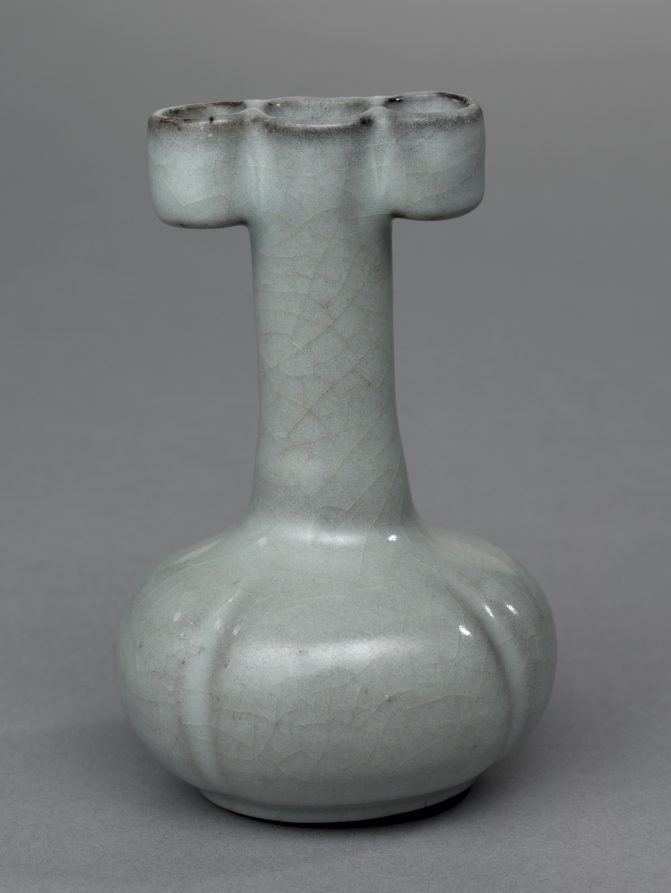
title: Arrow-Holder Vase (Jianhu)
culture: China, Zhejiang province, Hangzhou, Southern Song dynasty (1127-1279)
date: 1200s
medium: porcelaneous stoneware, Guan ware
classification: Ceramic